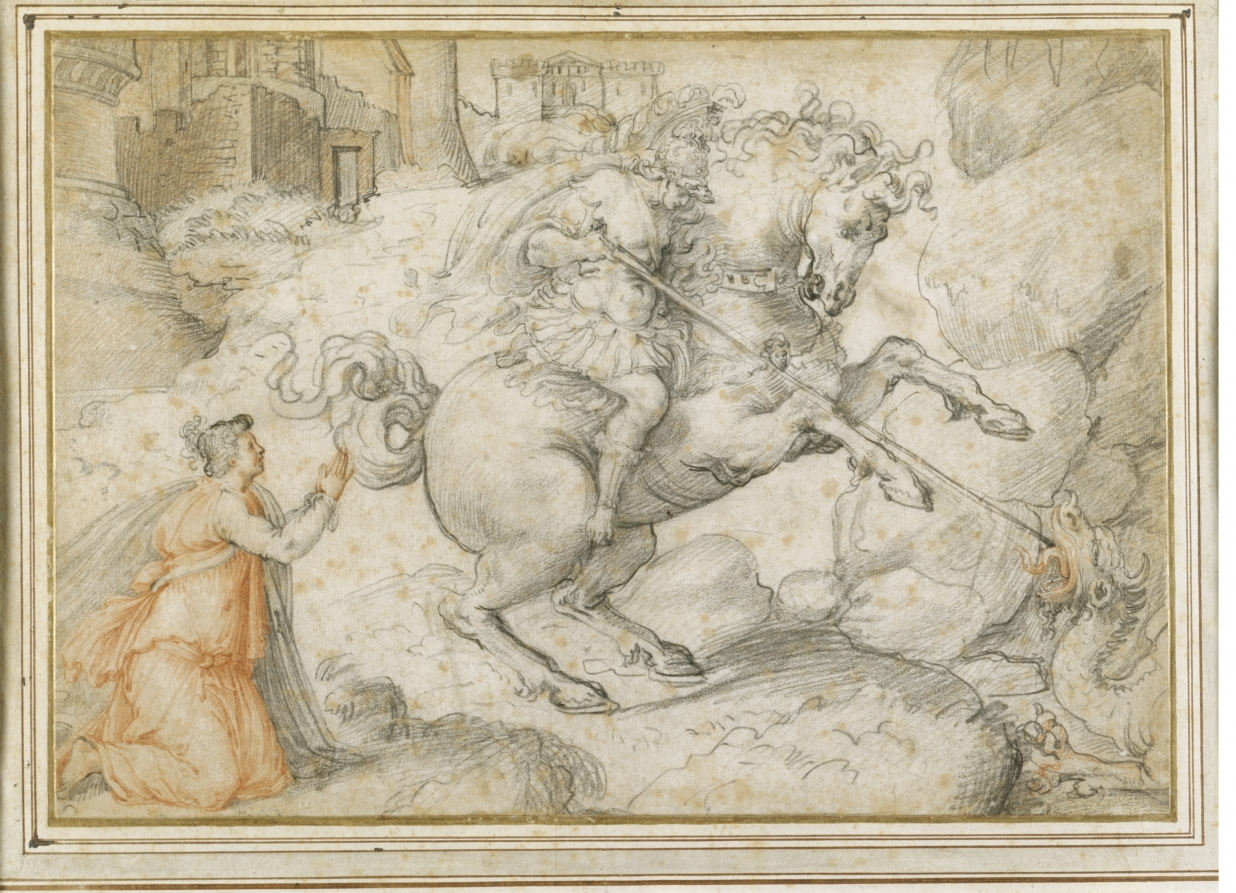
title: St. George and the Dragon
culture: Italy, 16th century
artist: Francesco Salviati (Italian, 1510–1563)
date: c. 1530s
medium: black chalk with red chalk, stumped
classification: Drawing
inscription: VERSO OF SECONDARY SUPPORT, upper center, in brown ink: C. Salviati ; upper left, in graphite: Box6 - 5. ; center, in graphite: 10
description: According to a legend based on Greek myth, as Saint George passed through Libya, he rescued a king’s daughter who had been left as a sacrifice to placate a vicious dragon. In gratitude for being delivered from the monster’s tyranny, the king’s subjects converted to Christianity. Here George wears armor in the ancient style based on Roman sculpture. Classical armor in Renaissance art was reserved for elite male subjects as a sign of their virtue. As a military saint, George’s attire conveys his antiquity as an early Christian hero (died about AD 303), conferring on him a sense of Roman authority and gravity.